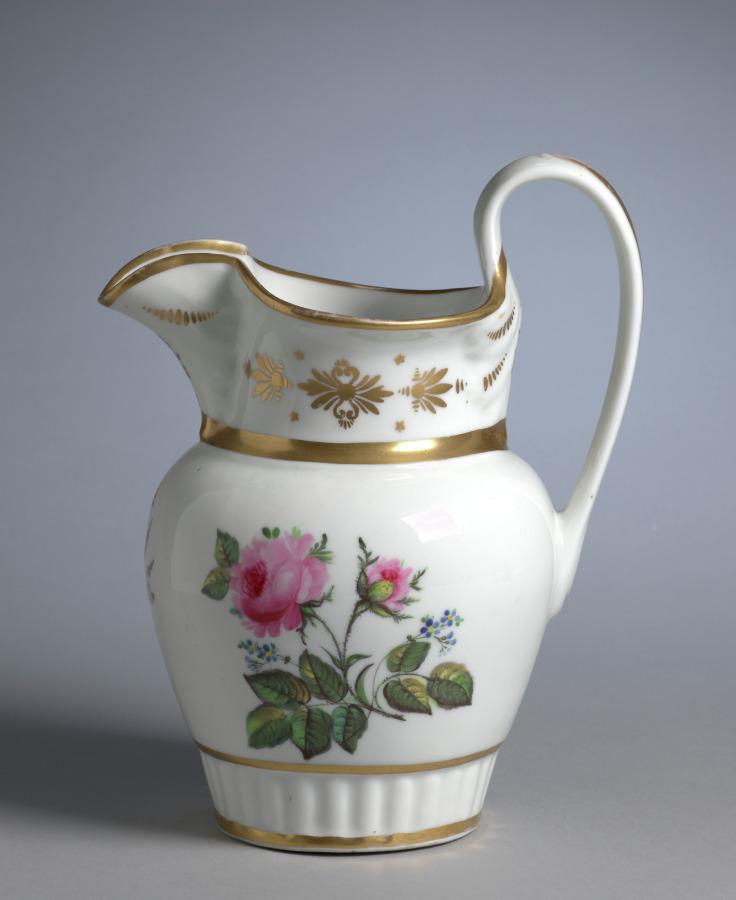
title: Pitcher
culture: America, Pennsylvania, Philadelphia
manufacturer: Tucker Factory (American)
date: c. 1830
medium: porcelain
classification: Ceramic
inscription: bears tape on bottom inscribed: Josephine Wood [Price?] / this belongs to [---] / Wood.